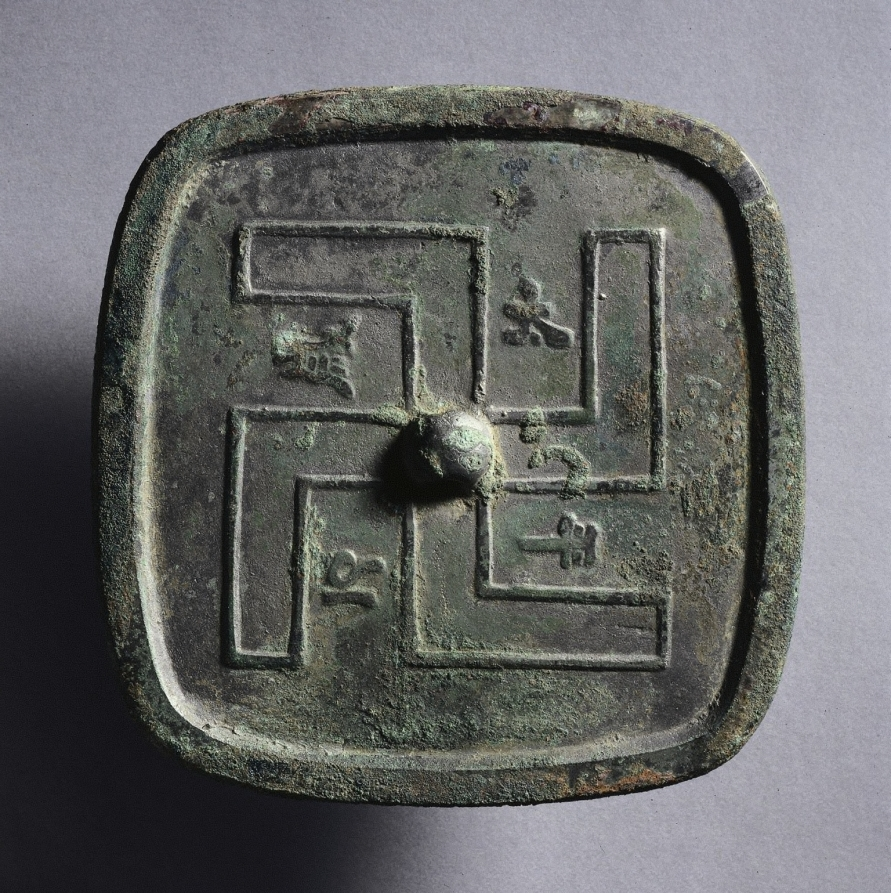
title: Square Mirror with Wan Symbol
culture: China, Liao dynasty (916-1125), Taiping period (1020-1030)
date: early 1000s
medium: bronze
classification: Metalwork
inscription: 太平萬歲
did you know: In Asia, the wan 萬 symbol is associated with prosperity, good fortune, and various religions, Buddhism in particular.